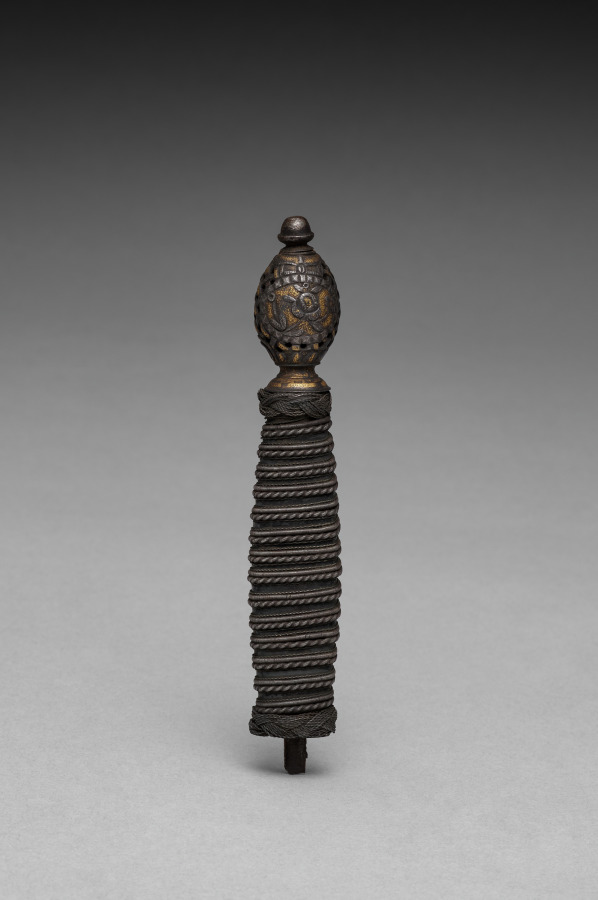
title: Court Sword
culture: France, late 18th century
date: late 1700s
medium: steel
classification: Arms and Armor